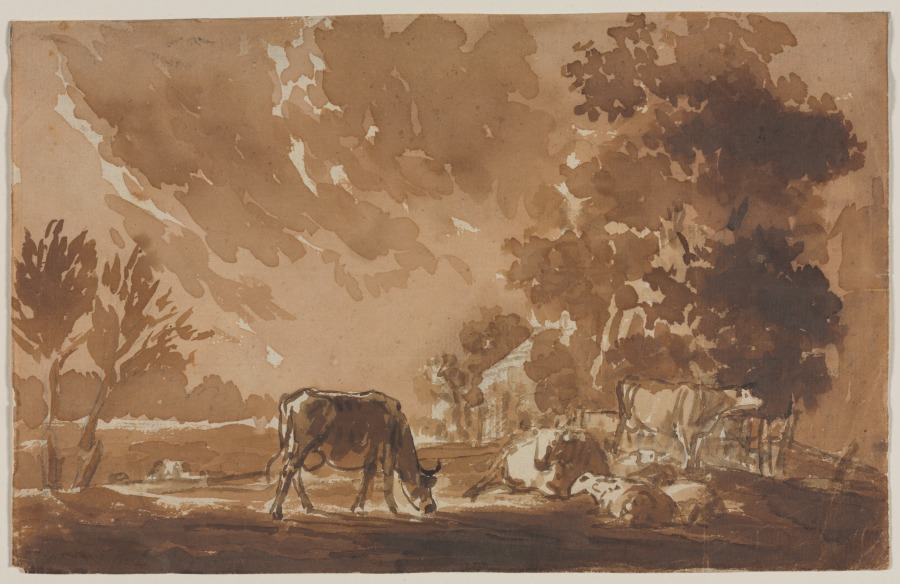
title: Landscape with Cattle (recto) Cattle (verso)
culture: France, 19th century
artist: Jules Dupré (French, 1811–1889)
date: second or last third 1800s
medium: brush and brown wash over graphite; framing lines in graphite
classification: Drawing